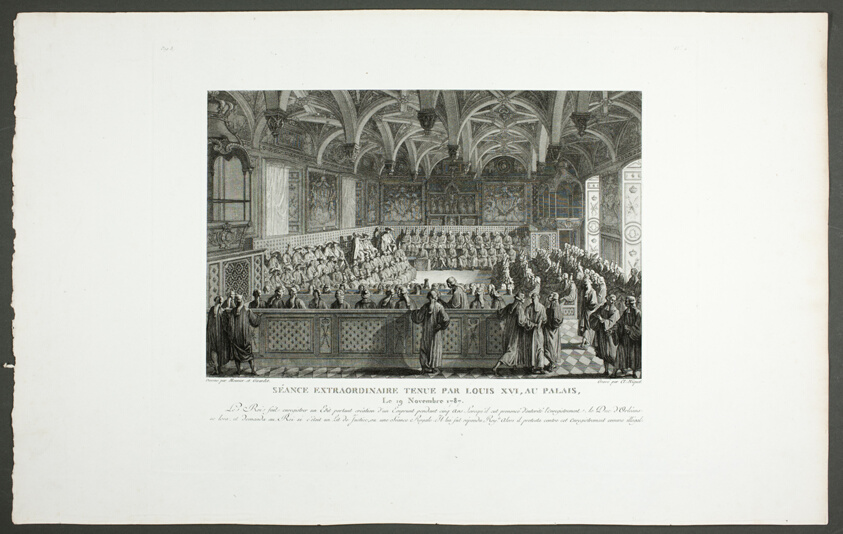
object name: Print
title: Special Session Held by Louis XVI at the Palace, from the series Tableaux historiques de la Révolution française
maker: Claude Niquet (French, c. 1770-1831); after Meunier (probably French or Belgian, 18th century); after Abraham Girardet (French, 1764-1823)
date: 1798-1804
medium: Etching with engraving on ivory wove paper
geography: France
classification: etching; print; prints and drawing